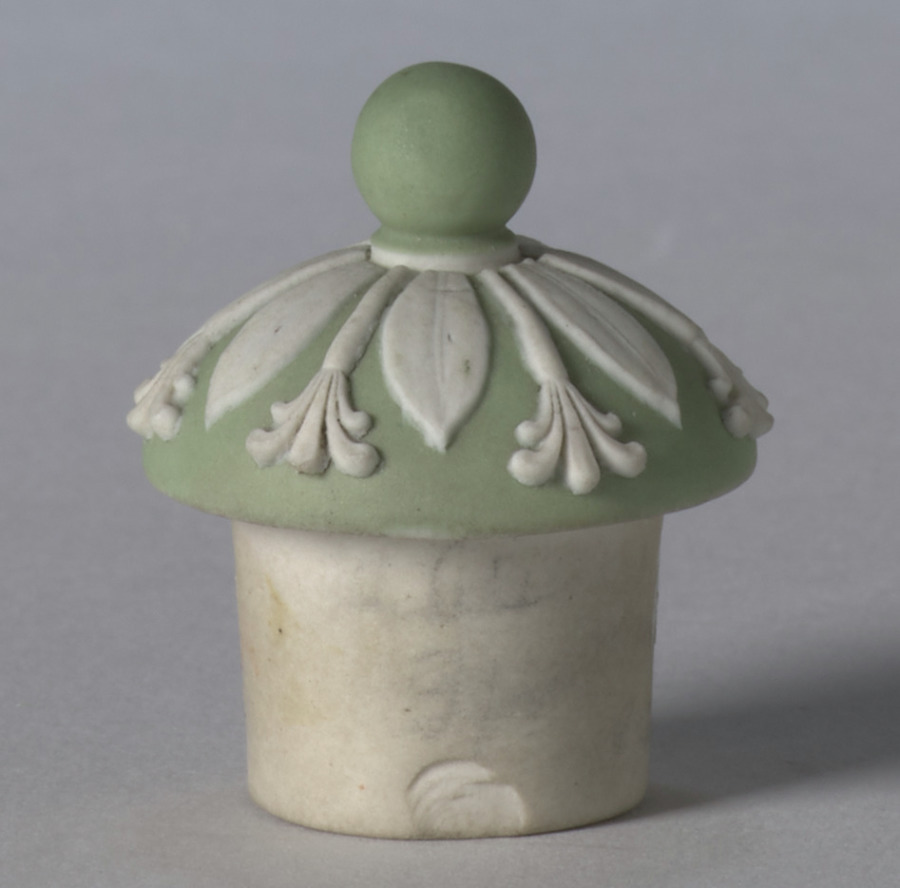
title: Cover for an Urn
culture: England, Staffordshire, late 18th-early 19th Century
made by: Wedgwood Factory (British)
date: c. 1800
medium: jasper ware with relief decoration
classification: Ceramic